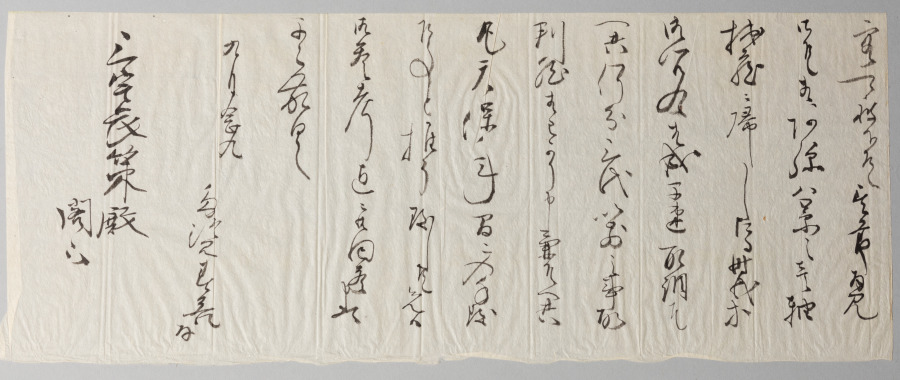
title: Landscape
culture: Japan, Edo period (1615–1868)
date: early 1600s to mid-1800s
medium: hanging scroll; ink on paper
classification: Painting